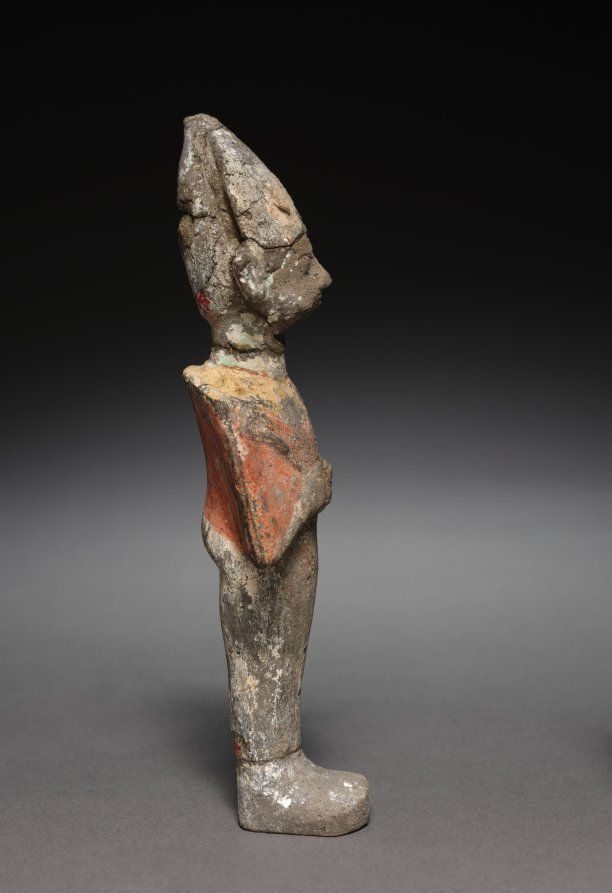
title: Statuette of Osiris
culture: Egypt, New Kingdom (1540–1069 BCE), Dynasties 19–20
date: 1295–1069 BCE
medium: painted terracotta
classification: Funerary Equipment